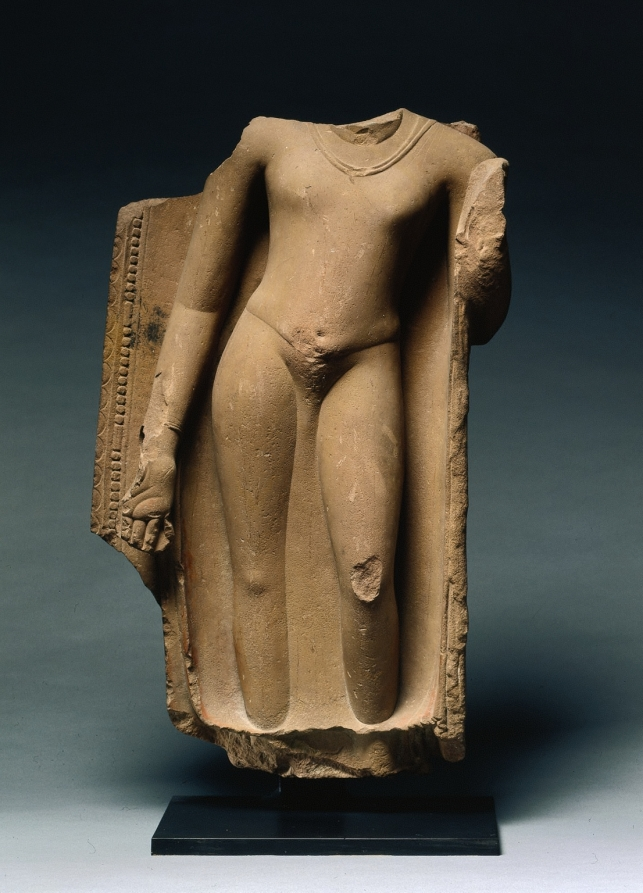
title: Standing Buddha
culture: Northern India, Uttar Pradesh, Sarnath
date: 400s CE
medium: sandstone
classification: Sculpture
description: Depicting the Buddha in a plain robe that clings to the body, without interrupting the beauty of its contours, was a new development in the sculptural workshops of Sarnath during the 400s CE. Sarnath is located near the ancient city of Varanasi on the banks of the Ganges River and is identified as the place where the Buddha gave his first teaching. This form spread by means of portable images to peninsular Southeast Asia.